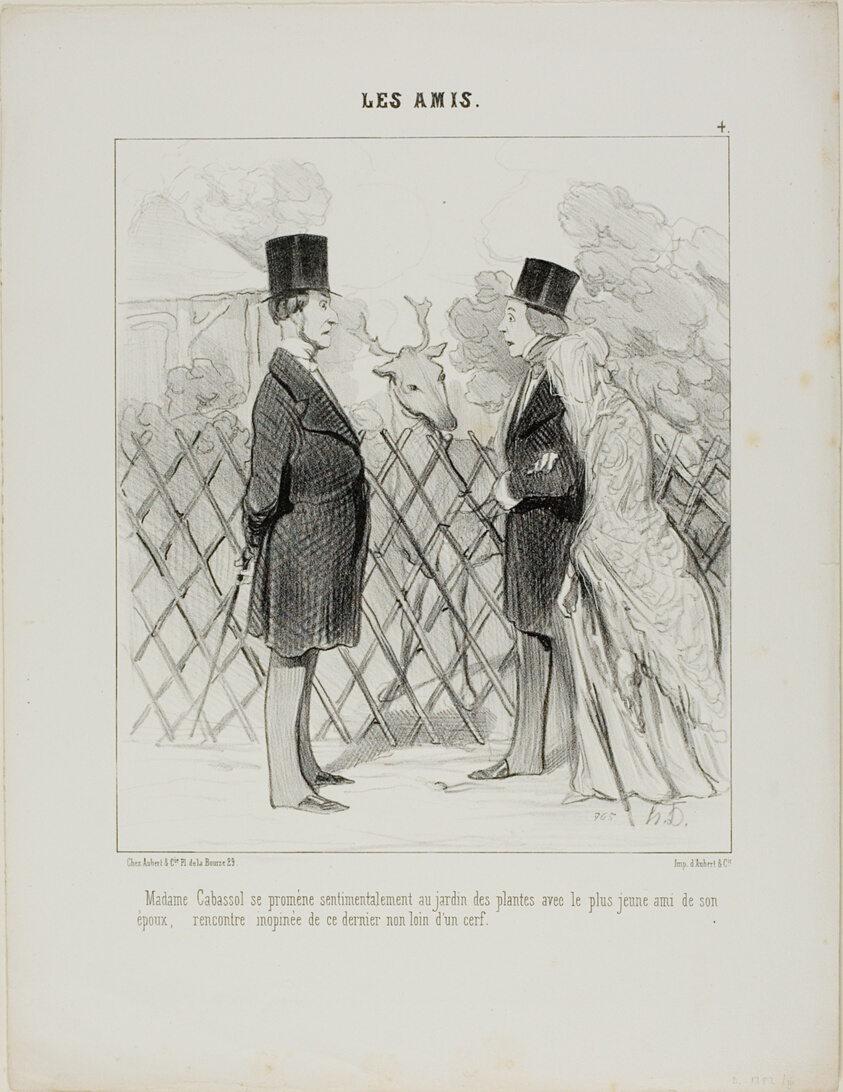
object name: Print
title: Madame Cabassol going for a romantic stroll in the botanical gardens together with the youngest friend of her husband's. Sudden encounter with the latter not far from a stag, plate 4 from Les Amis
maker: Honoré Victorin Daumier; French, 1808-1879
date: 1845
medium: Lithograph on white wove paper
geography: France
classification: lithograph; print; prints and drawing